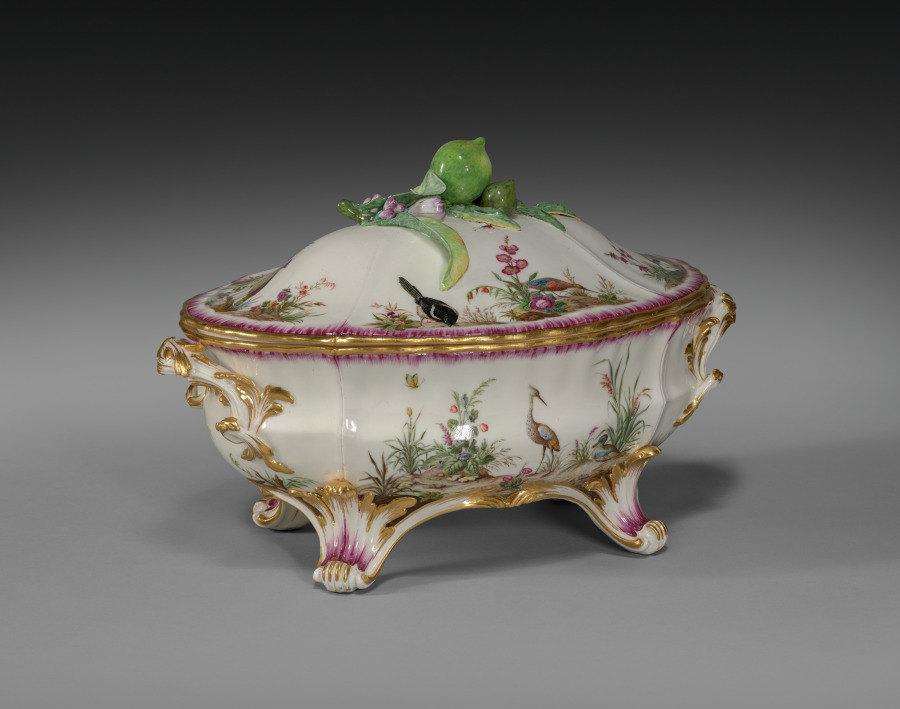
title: Covered Tureen (Terrine ancienne or Terrine ordinaire)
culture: France, Vincennes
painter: attributed to Louis-Denis Armand (French, active c. 1745–1783)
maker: Vincennes Porcelain Factory (France, 1740–56)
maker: probably by Jean-Claude Duplessis le Père (French, 1690–1774)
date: c. 1752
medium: soft-paste porcelain with enamel and gilt decoration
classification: Ceramic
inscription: [Interlaced foliate 'L's surmounted by a fleur-de-lys (indicating royal commision), in blue]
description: The intricately painted birds that decorate this tureen are the work of Louis-Denis Armand. Armand was known for his depictions of birds and landscapes, a specialty that may have come from his work as a painter of lacquered furniture with similar compositions. This tureen was likely designed by master goldsmith Jean-Claude Duplessis who began working as an artistic director at the Vincennes Porcelain Factory in 1748.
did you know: This object was manufactured in soft-paste porcelain, a material used by many European porcelain factories before they were able to emulate the hard-paste porcelain of China and Japan.